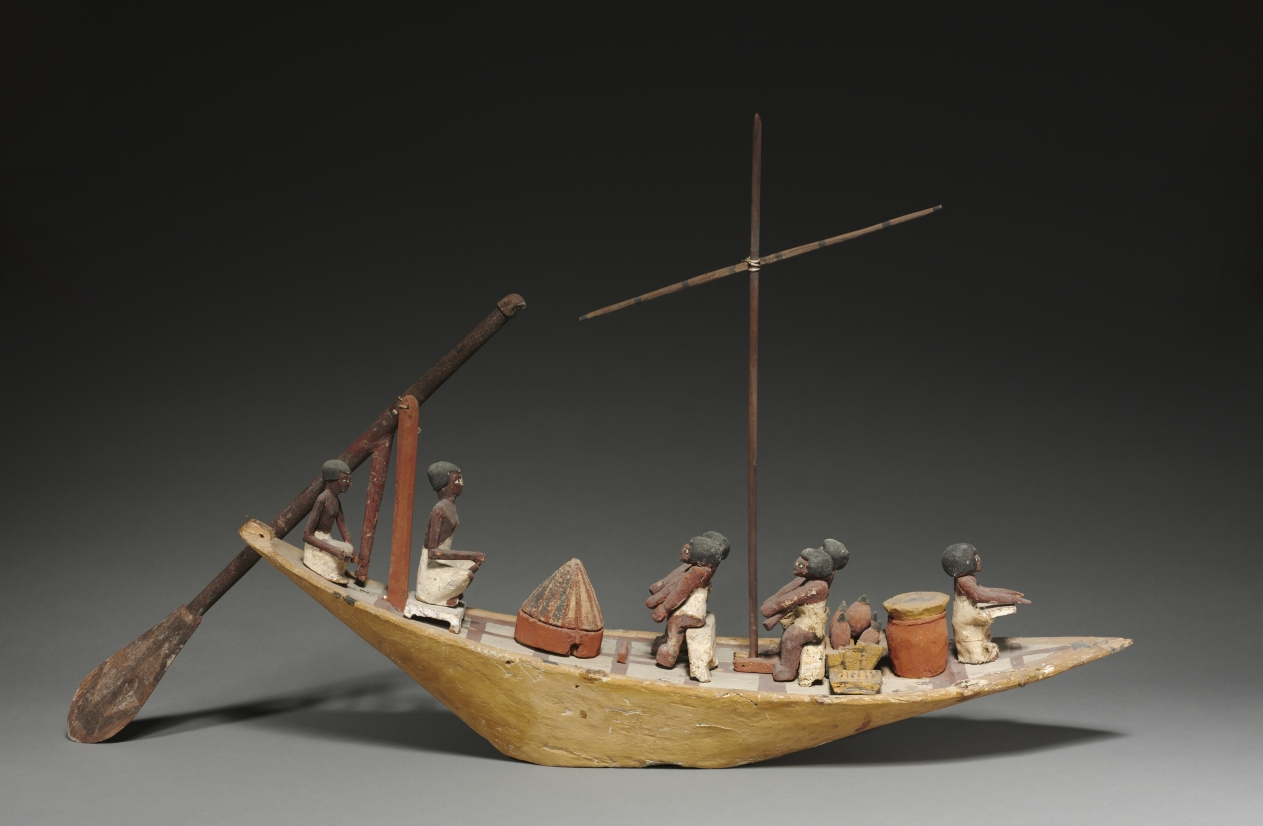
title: Model Boat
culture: Egypt, Middle Kingdom (2040–1648 BCE), Dynasties 11–12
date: 2040–1648 BCE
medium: gessoed and painted sycamore fig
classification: Funerary Equipment